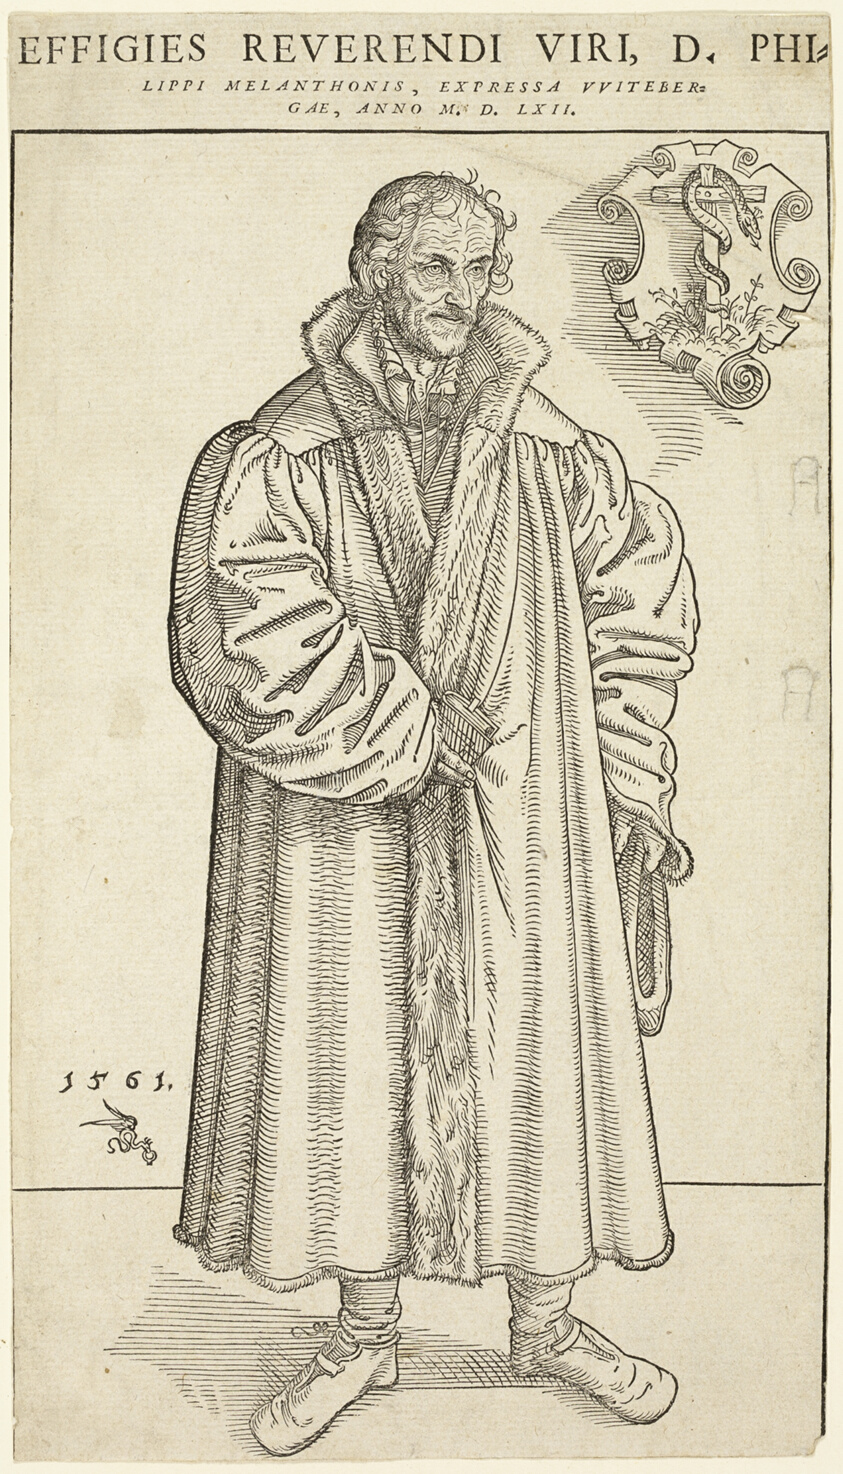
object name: Print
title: Philip Melanchthon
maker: Lucas Cranach, the Younger (German, 1515-1586); block cut by Jakob Lucius (German, c. 1530-1597)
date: 1562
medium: Woodcut in black with letterpress on ivory laid paper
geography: Germany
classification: woodcut; print; prints and drawing